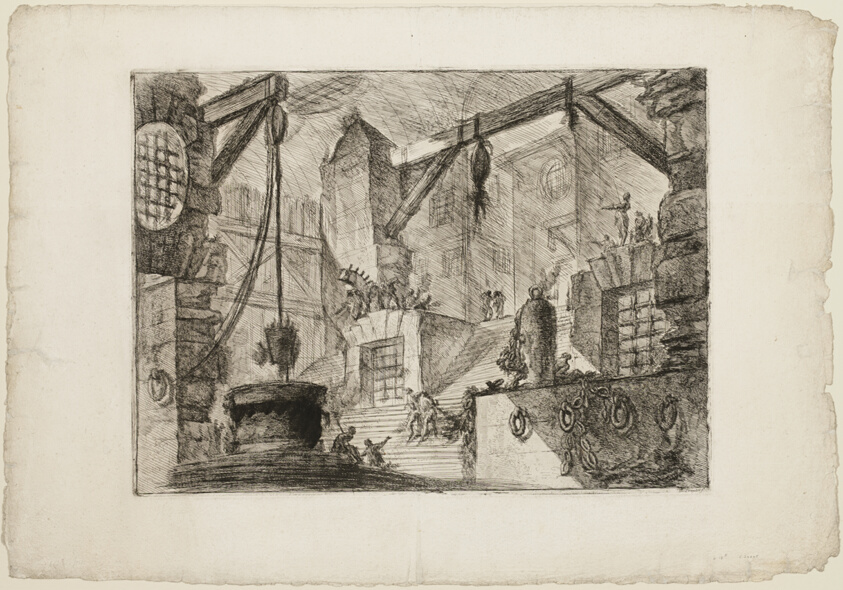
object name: Print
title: The Well, plate 13 from Imaginary Prisons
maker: Giovanni Battista Piranesi (Italian, 1720-1778)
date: c. 1750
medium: Etching and engraving on heavy ivory laid paper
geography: Italy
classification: etching; print; prints and drawing